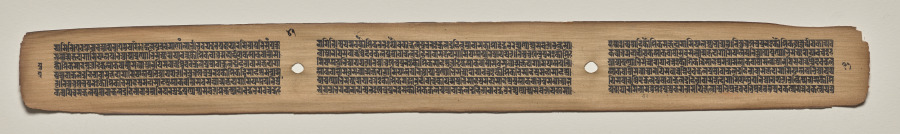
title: Text, Folio 41 (verso), from a Manuscript of the Perfection of Wisdom in Eight Thousand Lines (Ashtasahasrika Prajnaparamita-sutra)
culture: Eastern India, Bihar, Vikramashila Monastery. Painting: Nepal, Kathmandu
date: Sunday, September 14, 1119 (year 239 of the Newar Samvat in the month of Ashvina)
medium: gum tempera and ink on palm leaves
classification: Painting